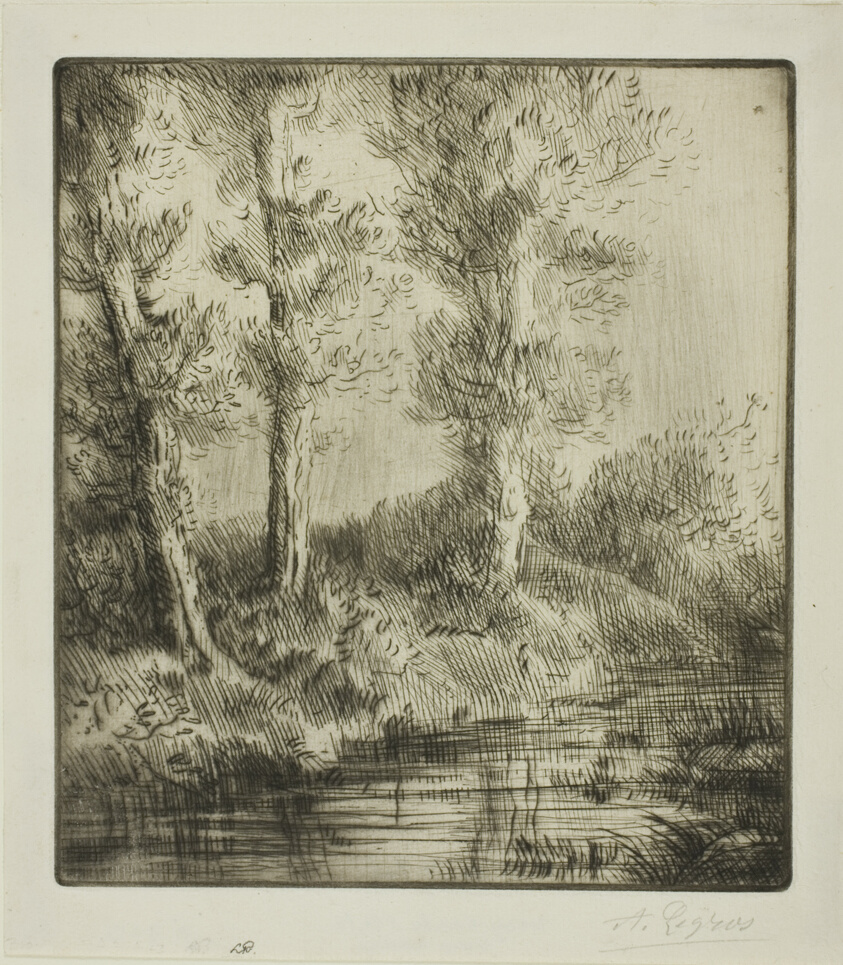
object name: Print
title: Banks of the Saint-Pré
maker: Alphonse Legros (French, 1837-1911)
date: c. 1885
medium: Etching and drypoint on ivory laid paper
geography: France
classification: etching; print; prints and drawing